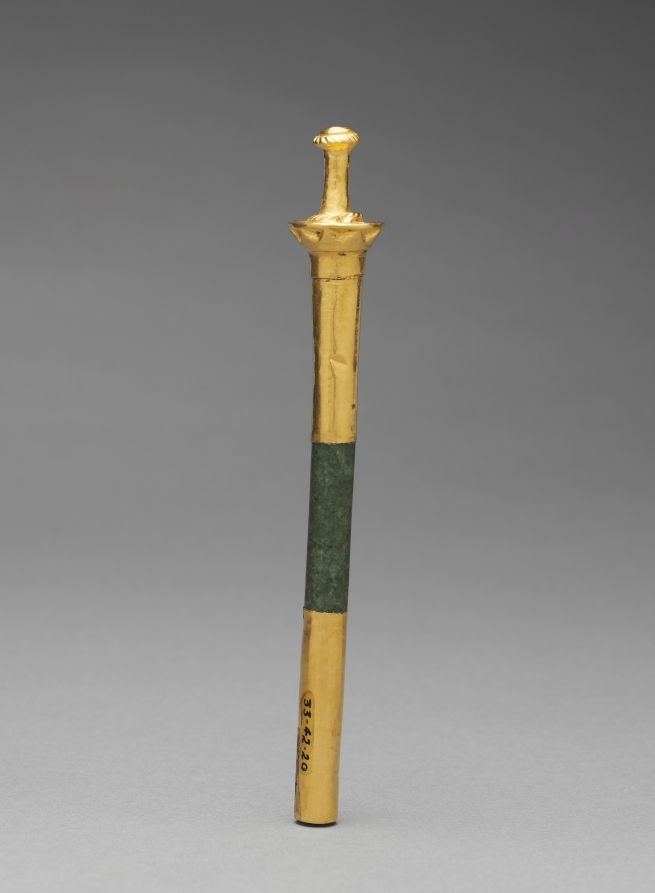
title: Ear Rod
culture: Panama, Conte style, 5th - 10th century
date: c. 700–900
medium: hammered gold, with greenstone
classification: Metalwork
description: Harvard archaeologists excavated this and seven other ornaments from several burials at Sitio Conte, a cemetery famous for its lavish graves of powerful chieftains. The young man buried in Grave 26 was such a chief. His status was stunningly memorialized by 21 human companions and 475 objects, many of them personal ornaments made of gold, including a large chest plaque and the rod-shaped ear ornament shown here.